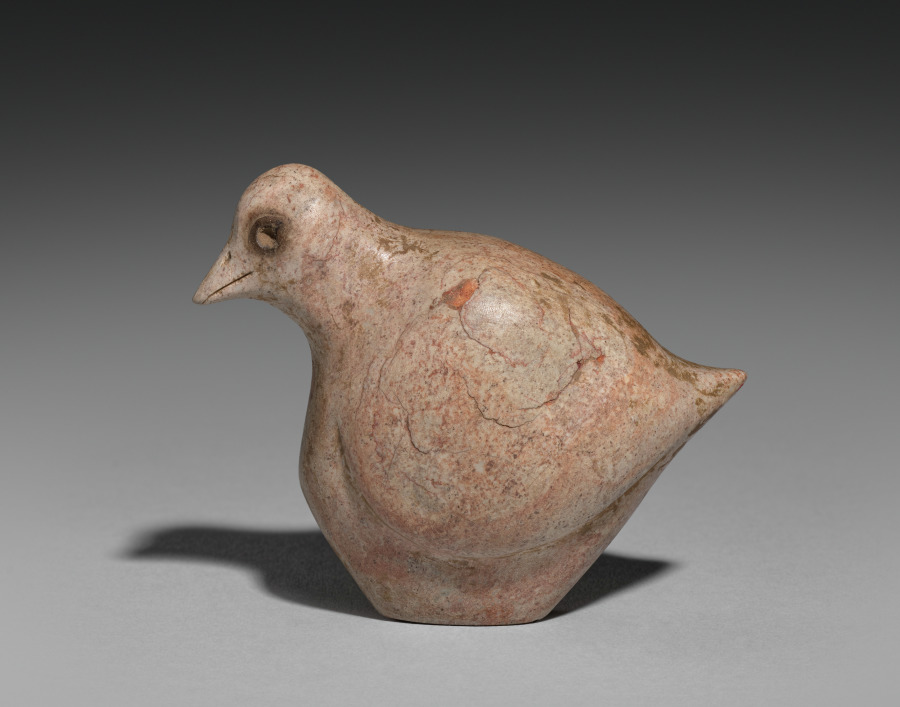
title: Nesting Quail Stamp Seal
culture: Iran, Lake Van region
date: 4000–3000 BCE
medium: dickite stone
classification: Sculpture